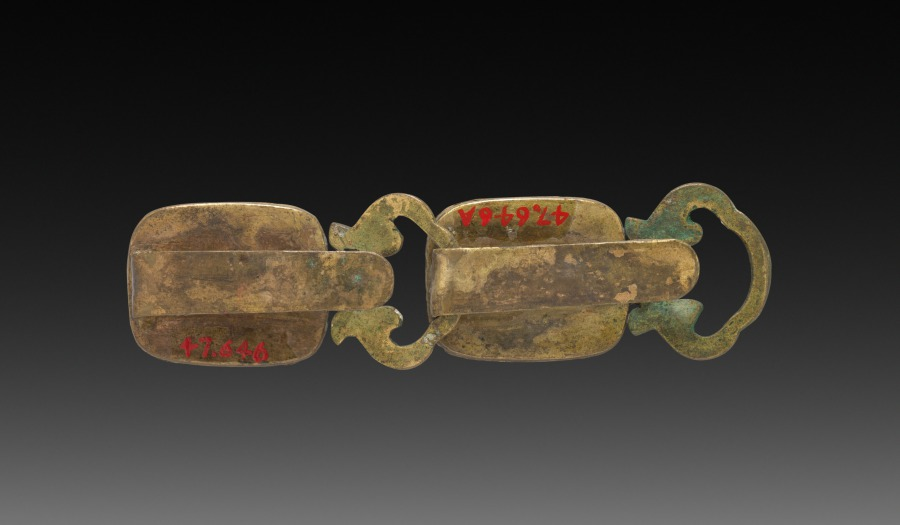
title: Buckle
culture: China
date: 1900s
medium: brass, engraved and set with jade and carnelian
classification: Jewelry